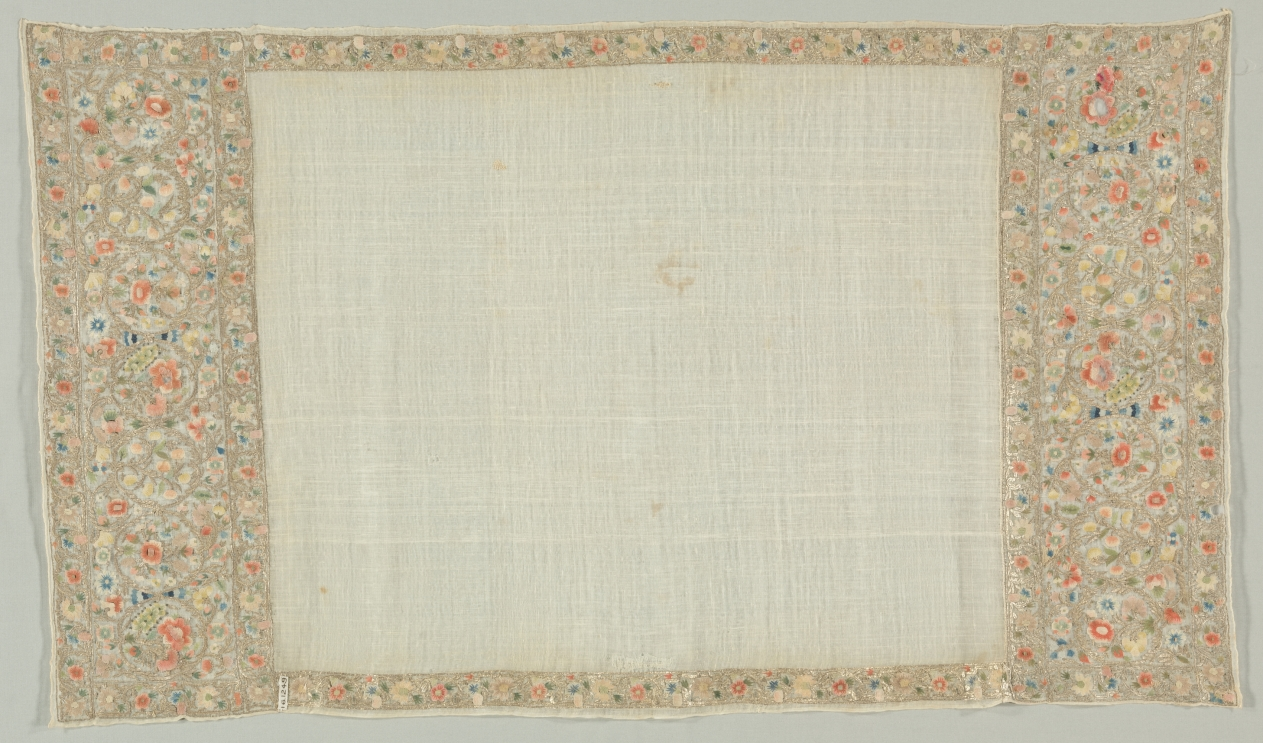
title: Embroidered Towel (Peshkir)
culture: Turkey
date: 1700s–1800s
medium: embroidery: silk and metal on cotton tabby ground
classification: Embroidery